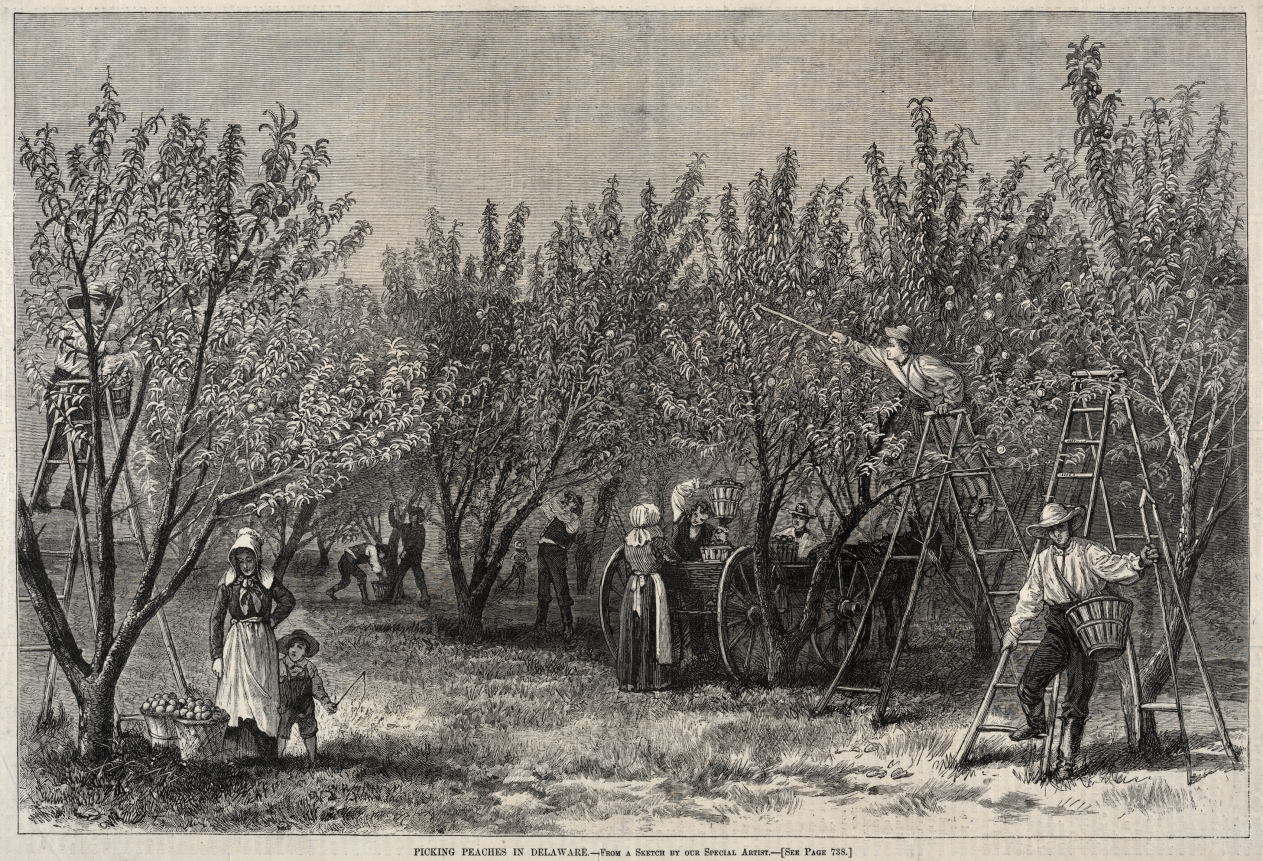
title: Picking Peaches in Delaware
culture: America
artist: Winslow Homer (American, 1836–1910)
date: c. 1878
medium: wood engraving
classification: Print